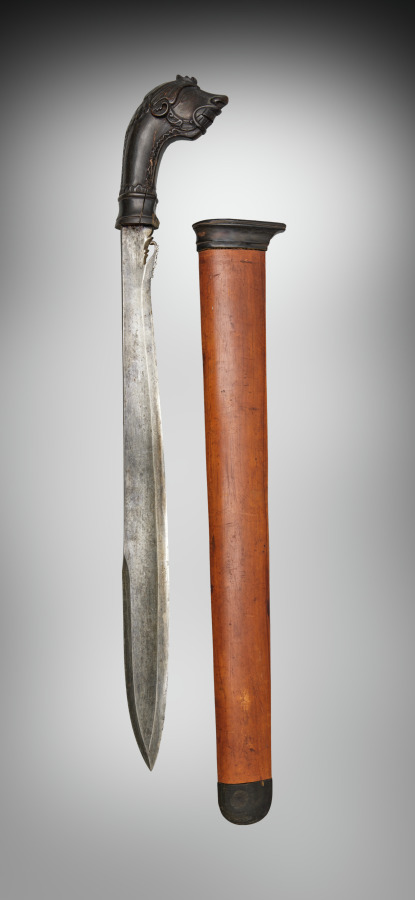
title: Sword and Scabbard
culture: Java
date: 1700s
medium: steel and ivory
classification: Arms and Armor